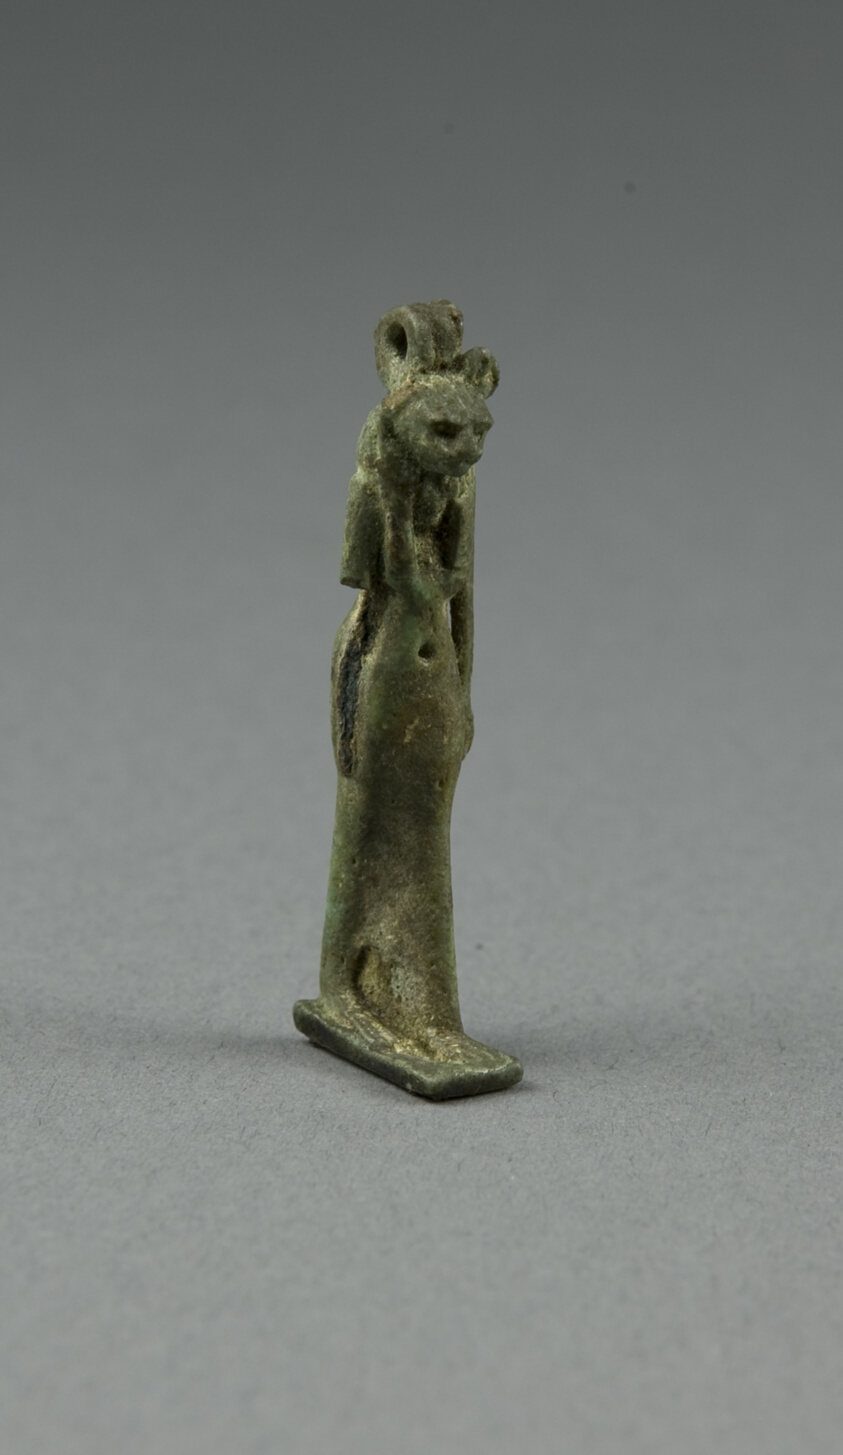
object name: Costume and Accessories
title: Amulet of the Goddess Bastet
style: third intermediate period, egyptian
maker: Egyptian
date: Third Intermediate Period, Dynasty 21–25 (1070–656 BCE)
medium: Faience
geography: Egypt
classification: amulet; jewelry; ceramics; ancient art; costume; faïence (composite material)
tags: goddesses